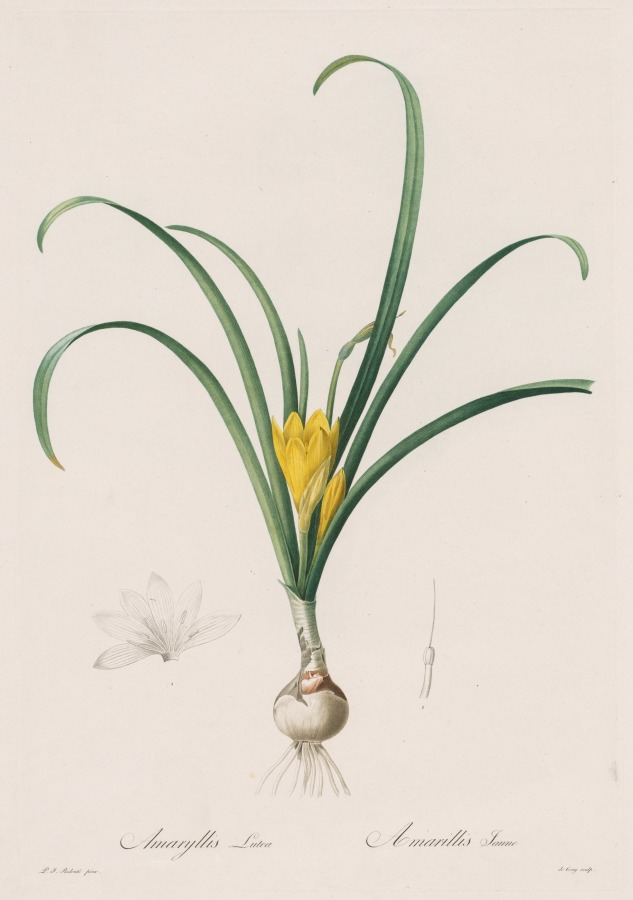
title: Les Liliacées: Amaryllis Lutes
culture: France, 19th century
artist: Henri Joseph Redouté (French, 1766–1853)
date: 1802–1816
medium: stipple and line engraving, with hand coloring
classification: Print